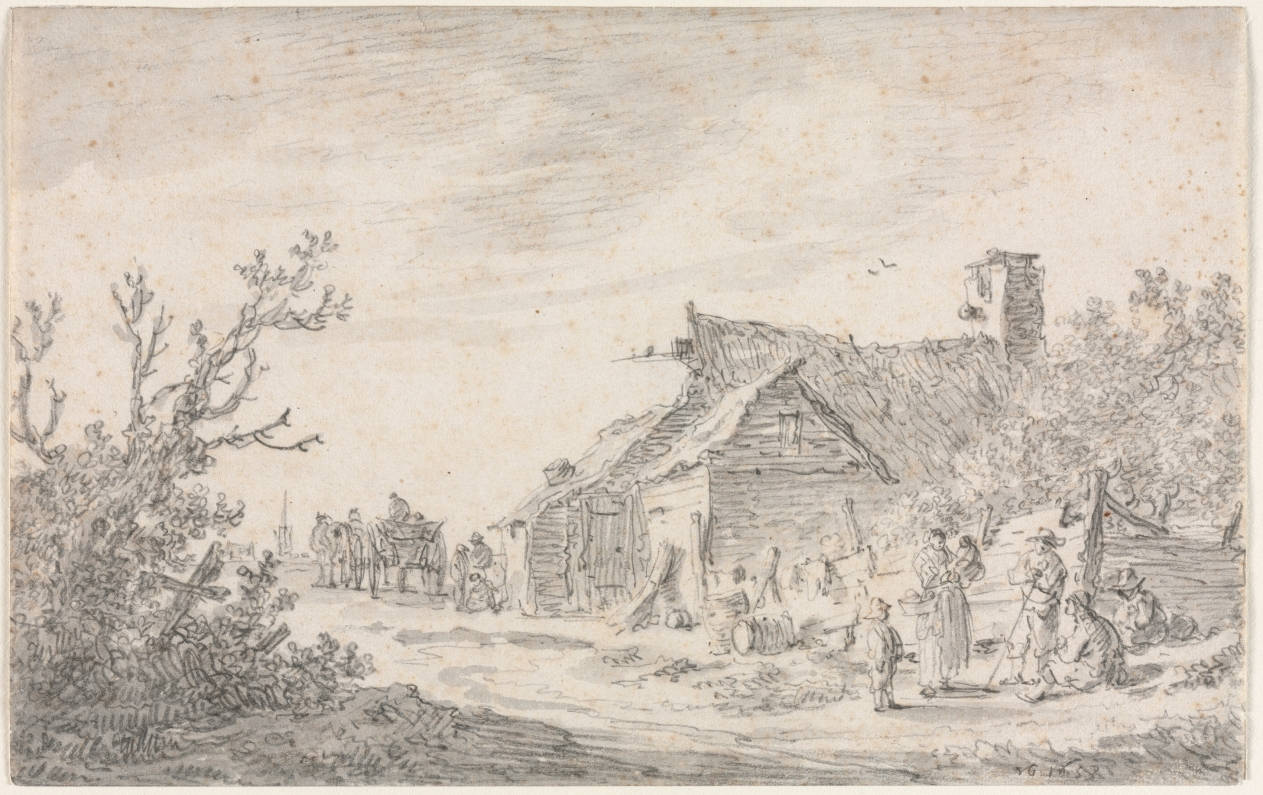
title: Landscape with a Cottage and Figures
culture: Netherlands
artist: Jan van Goyen (Dutch, 1596–1656)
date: 1653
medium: black chalk and brush and gray wash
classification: Drawing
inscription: signed, lower right, in black chalk: [artist monogram: vG] 1653 ; VERSO, lower center, in graphite: 156 ; lower left, in graphite: T 2235 ; lower left, in black chalk: [illegible] ; lower right, in graphite: A5217